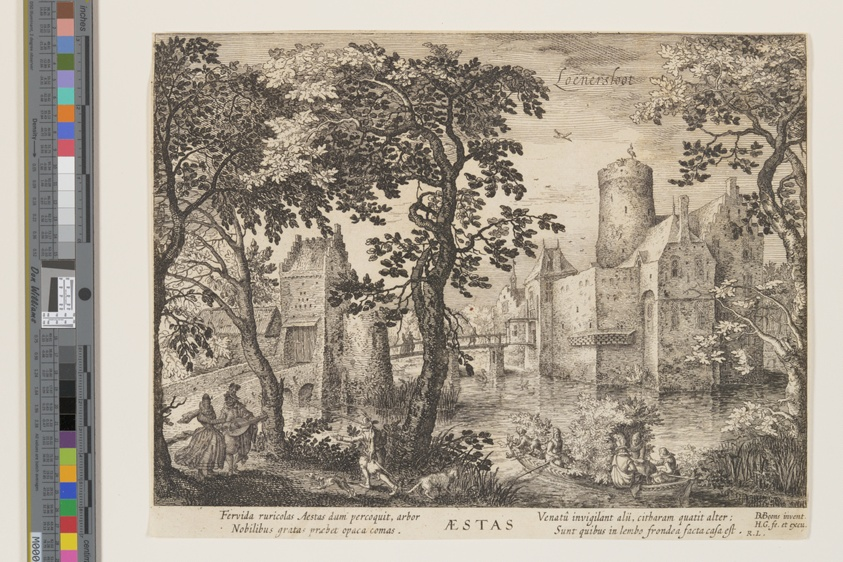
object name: Print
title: Loenersloot - Summer, from The Seasons, View of Castles in the Vicinity of Amsterdam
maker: Hessel Gerritsz (Dutch, 1581–1632); after David Vinckboons (Netherlandish, 1576–1629)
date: 1610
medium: Engraving on ivory laid paper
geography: Netherlands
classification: engraving; paper; print; prints and drawing